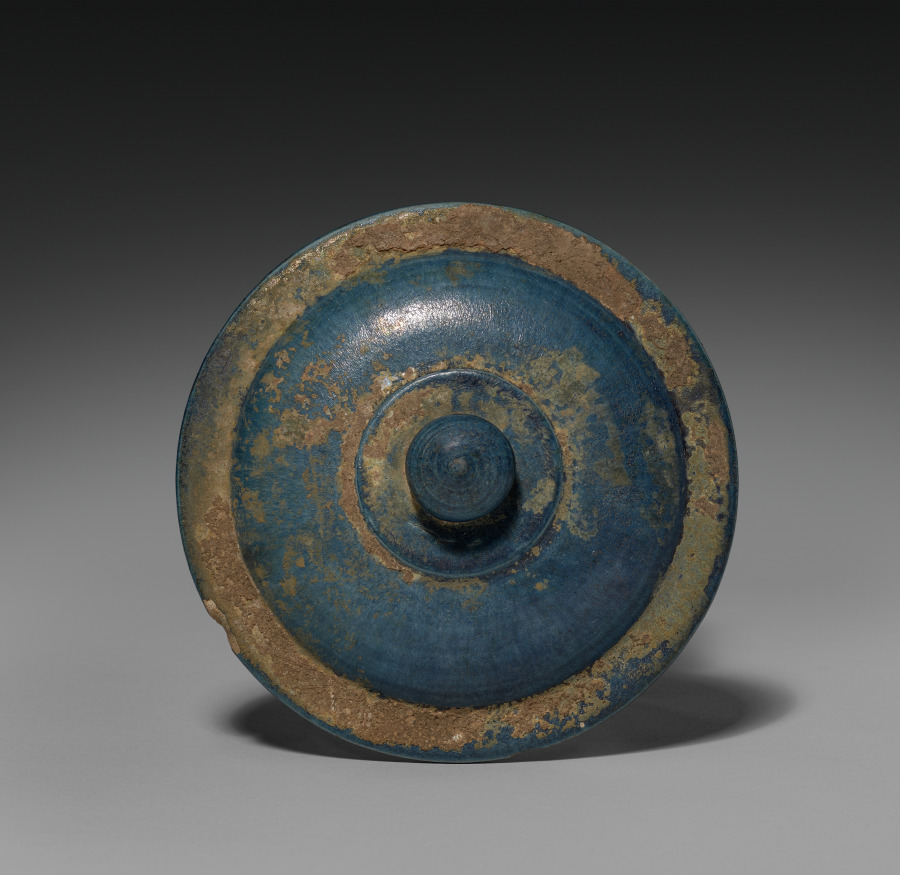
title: Covered Jar (lid)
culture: China, Tang dynasty (618-907)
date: early 700s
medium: glazed earthenware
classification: Ceramic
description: This covered cylindrical jar with three animal feet is lavishly covered with a cobalt blue glaze in the exterior and an amber glaze in the interior. Of the colored lead glazes of sancai (three-color) ware, blue was preeminent and precious. Imported cobalt from Persia (Iran, Afghanistan) was used as a glaze colorant that yields a rich, brilliant blue of considerable splendor.